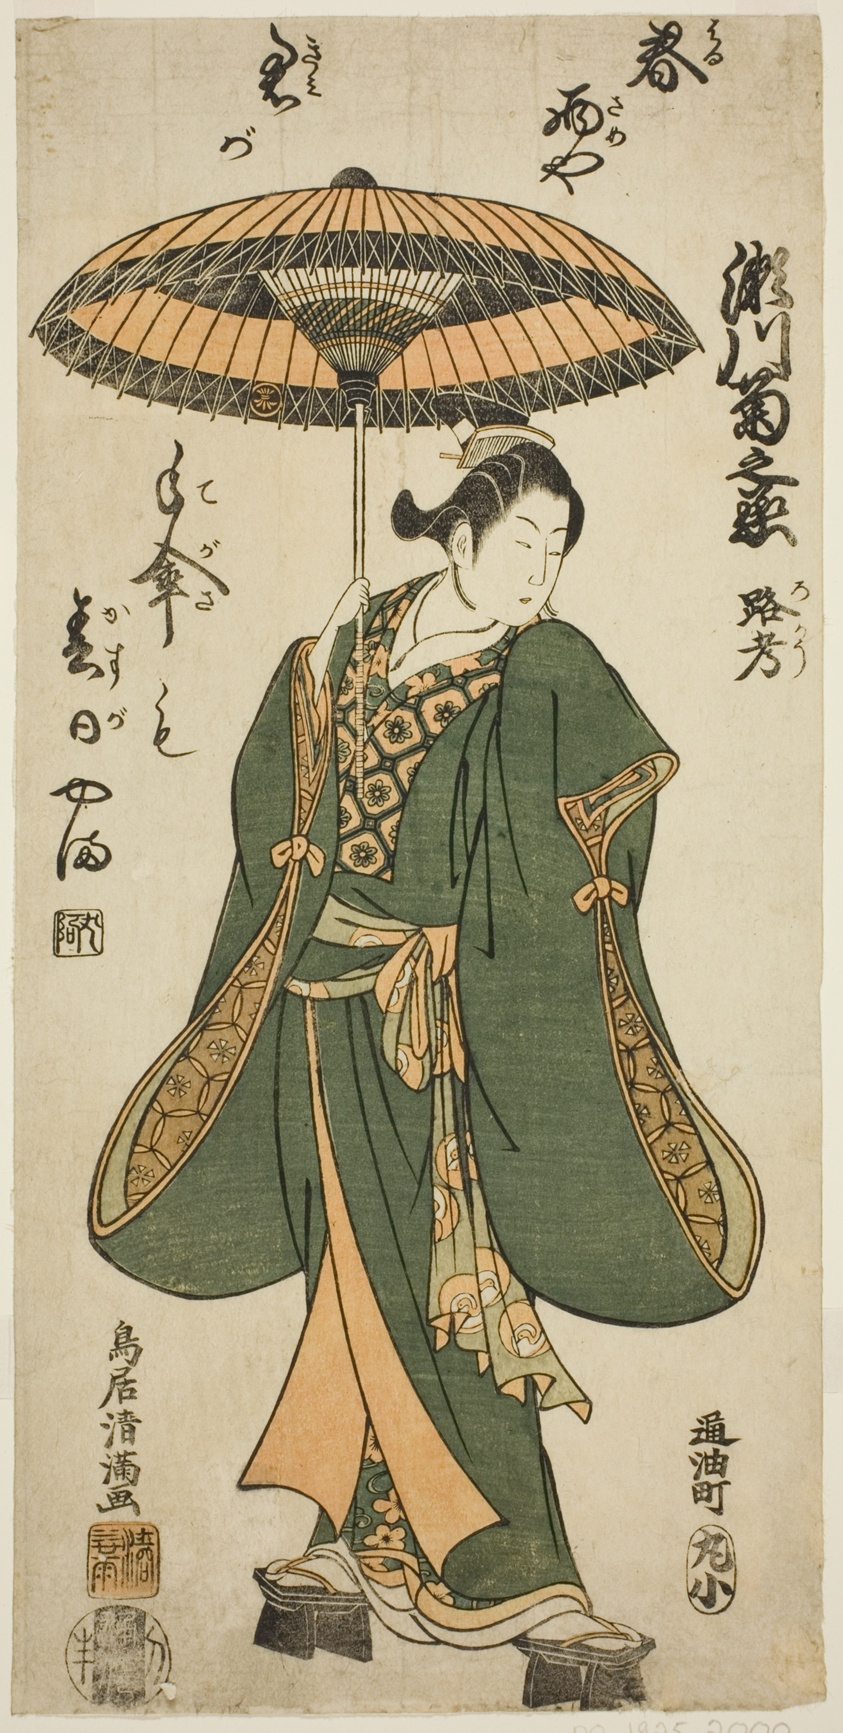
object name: Print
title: The Actor Segawa Kikunojo II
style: Japanese (culture or style)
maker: Torii Kiyomitsu I (Japanese, 1735–1785)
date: c. 1758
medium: Color woodblock print; o-hosoban, benizuri-e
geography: Japan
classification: woodblock print; print; asian art